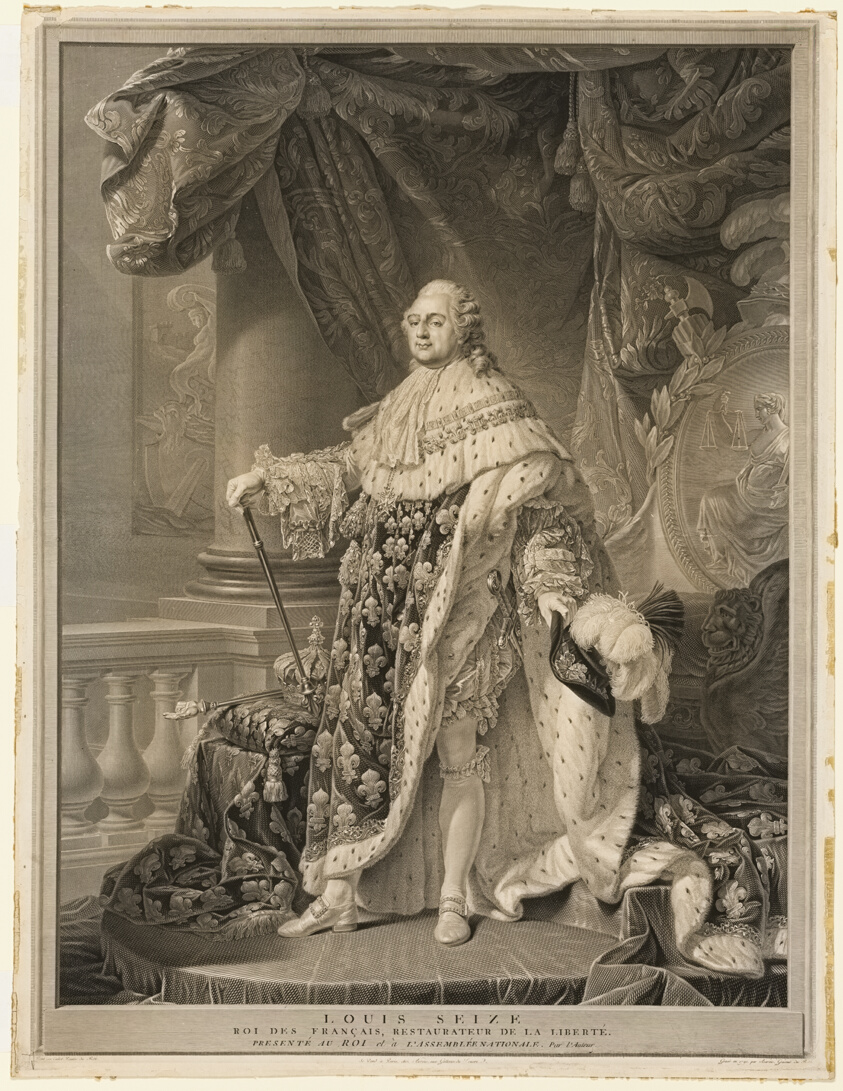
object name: Print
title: Louis XVI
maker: Charles Clément Bervic (French, 1756-1822); after Antoine Francois Callet (French, 1741-1823)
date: 1790, printed after 1815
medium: Engraving in black on cream laid paper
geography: France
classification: engraving; print; prints and drawing